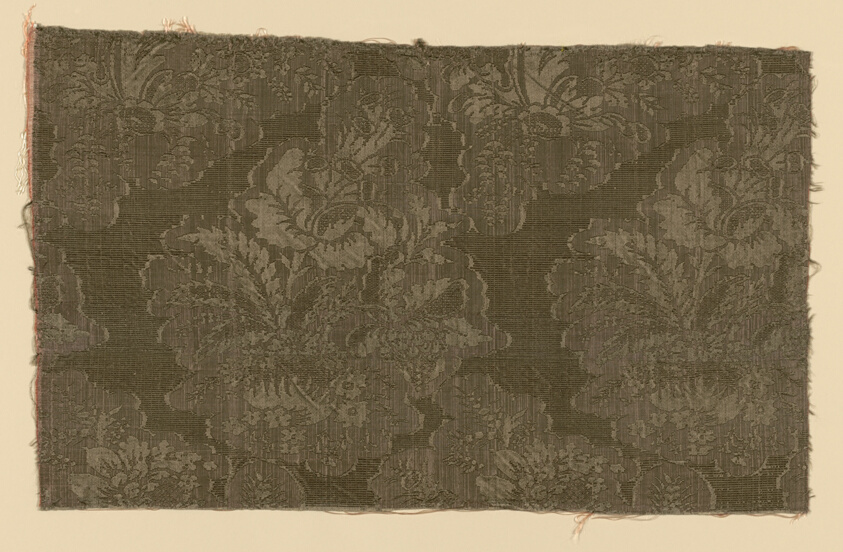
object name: Textile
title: Fragment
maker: England or France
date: 1725/75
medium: Silk, plain weave with supplementary patterning warps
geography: England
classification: textile; weaving